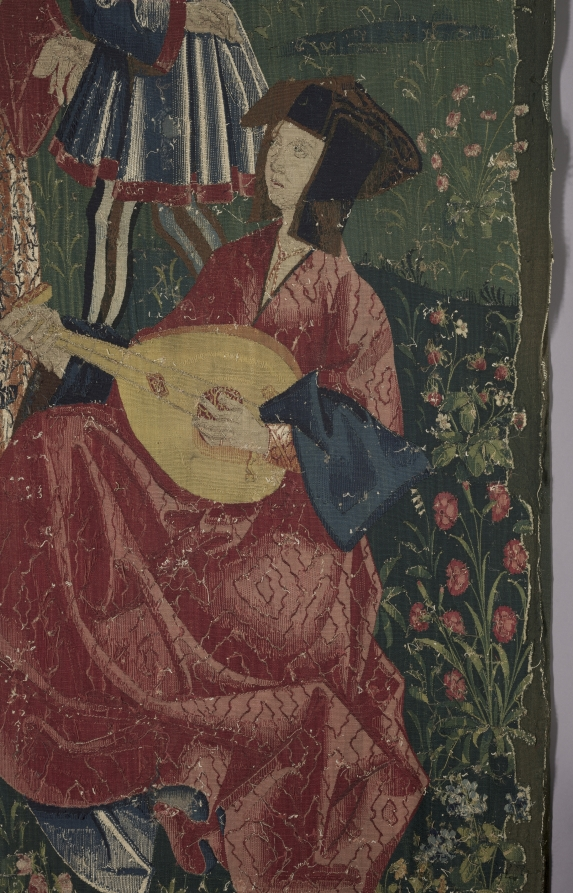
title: Youth (from Chateau de Chaumont set)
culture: France, Lyon(?), early 16th century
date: 1512–15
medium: silk and wool; tapestry weave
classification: Tapestry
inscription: French verse in Gothic letters translates as follows: Youth triumphs while its heart is healthy, And when it seems to hold all in its hand. But this triumph is without eternity. Here one sees the example full well: Those who are happy hide death in thier heart. Let the young heed this warning.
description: Louise of Savoy (1476-1531), queen mother of King Francis I, is depicted here in a sumptuous brocaded velvet in the center. She addresses youthful figures including Éléonore, Pierre Sala’s daughter who is facing her future husband, Hector. On the right, King Louis XII (died 1514) stands in front of the Chateau Langais where he had married Anne of Brittany. Above is Hector’s deceased father with a partially concealed skull under his robe, while a woman expresses surprise at the sight. The verse in Old French at the top states that youthful happiness is not eternal: Youth makes sounds as long as its heart is healthy, And thinks that it holds all in its hand. But this triumph is not eternal. Here you see clearly an example: He that is happy has death in his breast. Of this you people should take note.